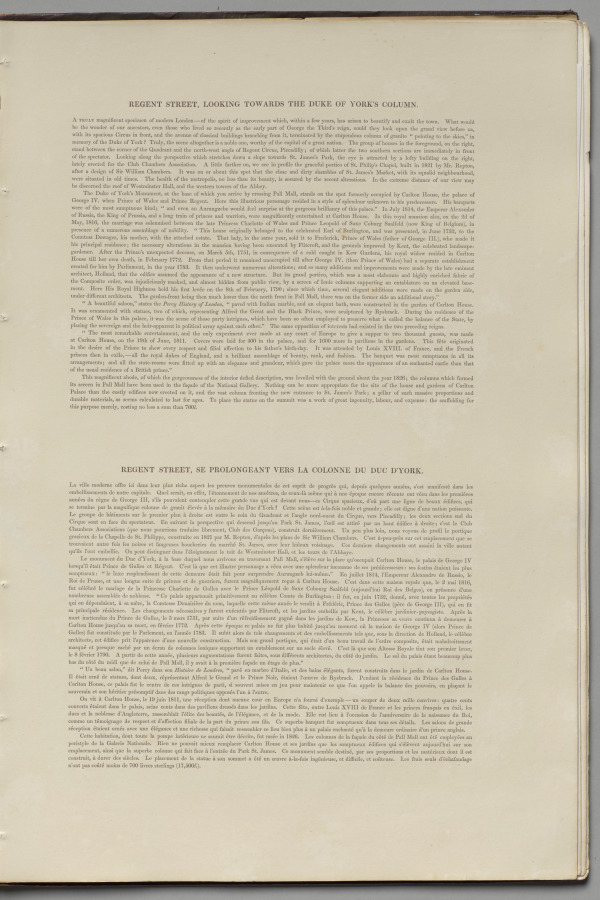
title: London As It Is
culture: England, 19th century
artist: Thomas Shotter Boys (British, 1803–1874)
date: 1842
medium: lithograph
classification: Bound Volume